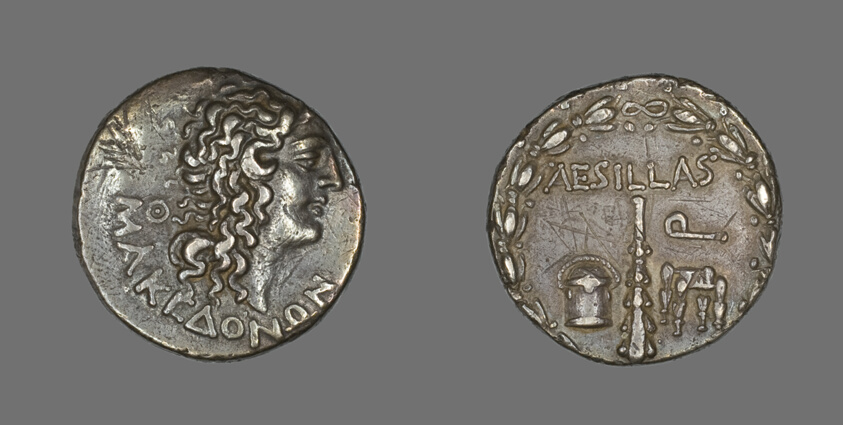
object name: Coin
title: Tetradrachm (Coin) Portraying Alexander the Great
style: hellenistic, ancient, greek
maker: Greek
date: 93-92 BCE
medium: Silver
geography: Macedonia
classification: coin; ancient art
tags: alexander the great